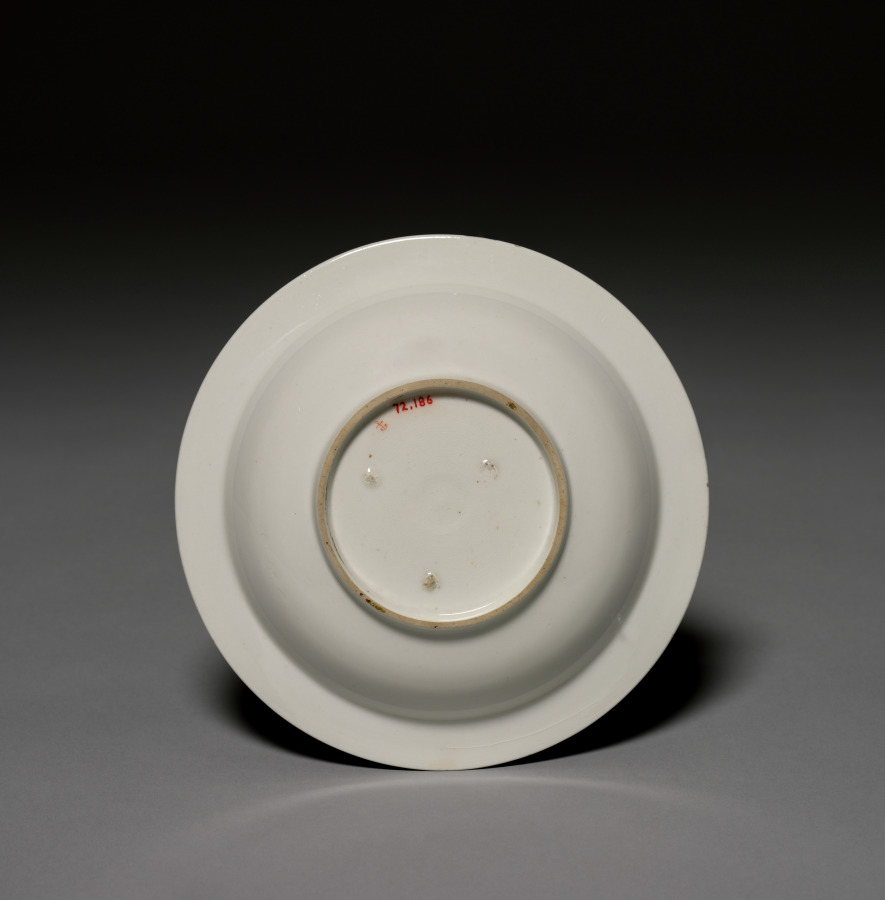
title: Dish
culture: England, Chelsea, 18th century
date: c. 1755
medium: soft-paste porcelain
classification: Ceramic